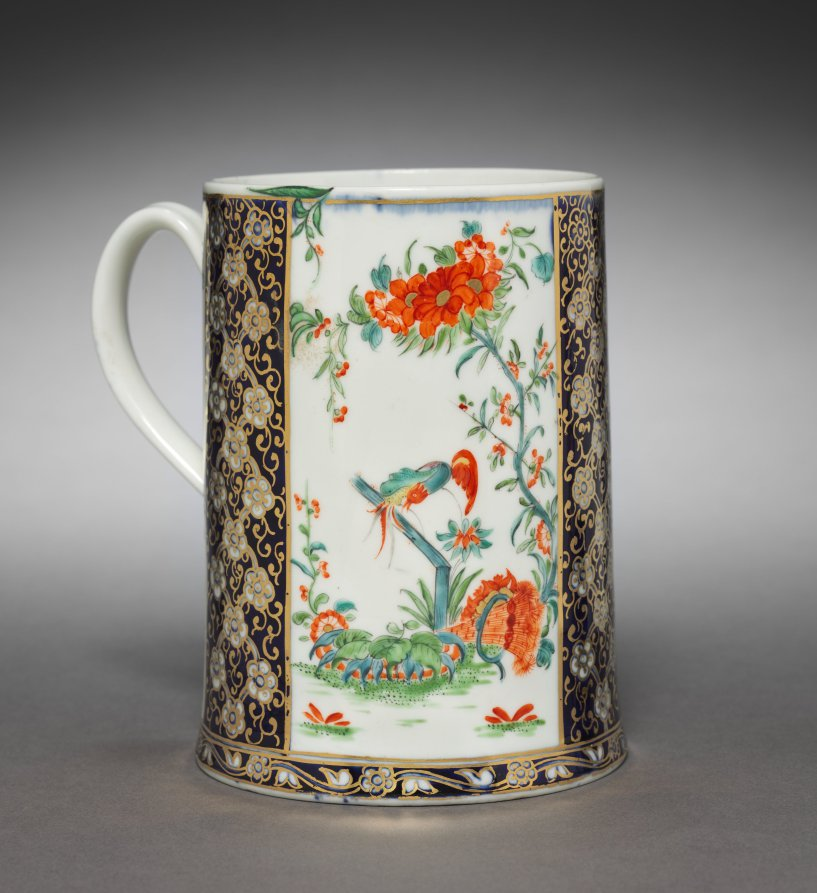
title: Cann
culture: England, 18th century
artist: Chelsea Porcelain Factory (Britain, London, 1745–84)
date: c. 1800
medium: porcelain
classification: Ceramic